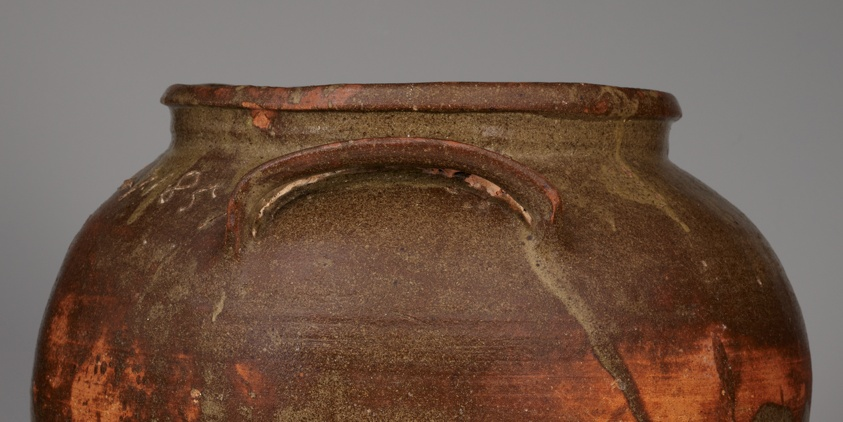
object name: Ceramics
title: Storage Jar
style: 19th century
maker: David Drake (American, c. 1801–1870s); Lewis Miles Stoney Bluff Manufactory [plantation] (American, c. 1840–70s); Edgefield, South Carolina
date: 1857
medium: Stoneware and glaze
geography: Edgefield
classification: container; american decorative arts; pottery; ceramics; stoneware; vessel; decorative arts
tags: storage